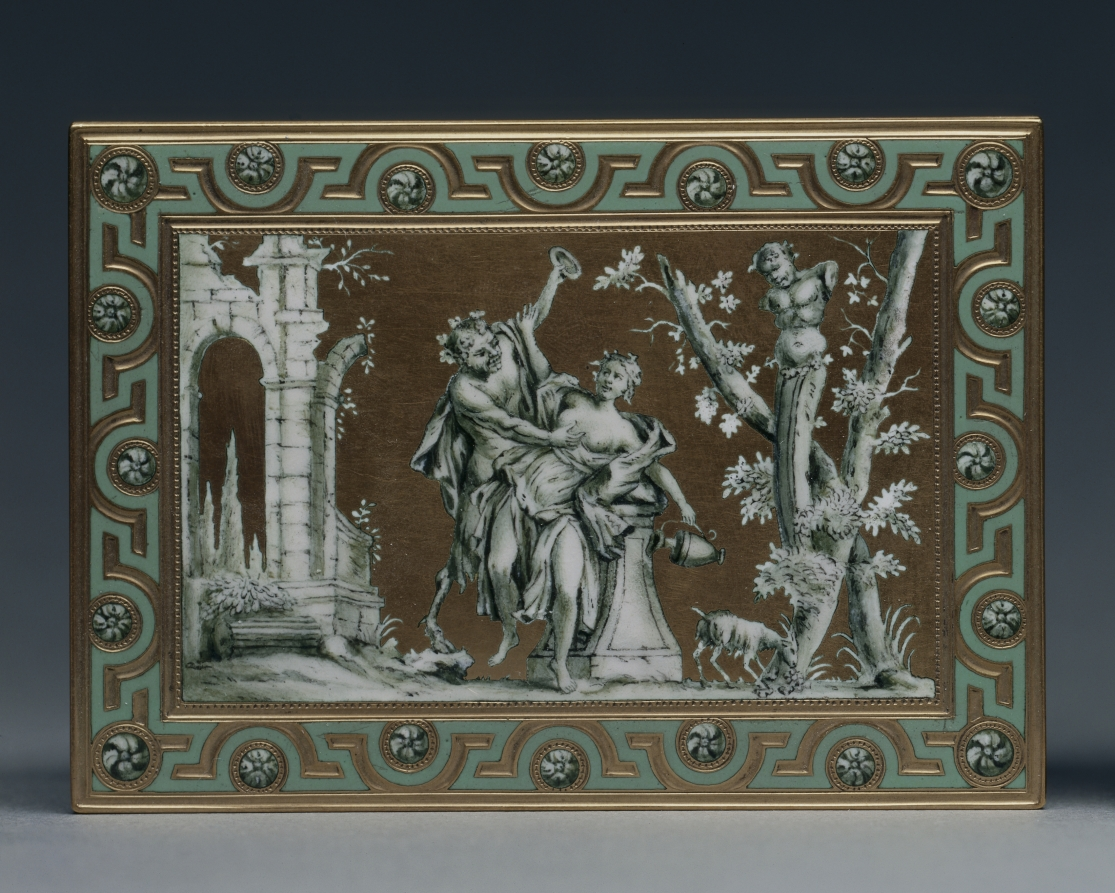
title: Box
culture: France, 18th century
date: c. 1768–1769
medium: gold and enamel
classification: Enamel